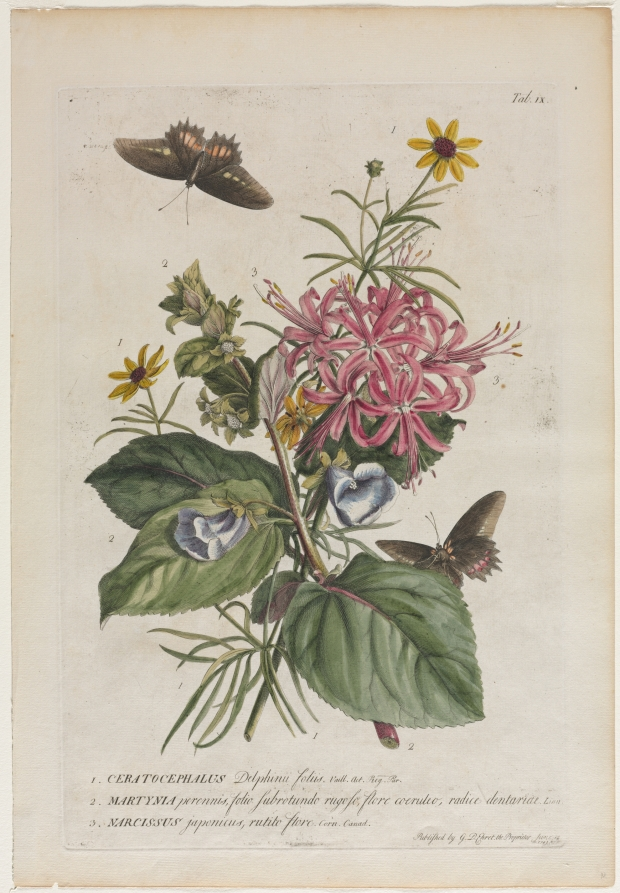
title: Plantae et papiliones rariores: No. 9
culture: Germany, 18th century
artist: Georg Dionysius Ehret (German, 1708–1770)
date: 1749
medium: engraving, hand-colored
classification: Print